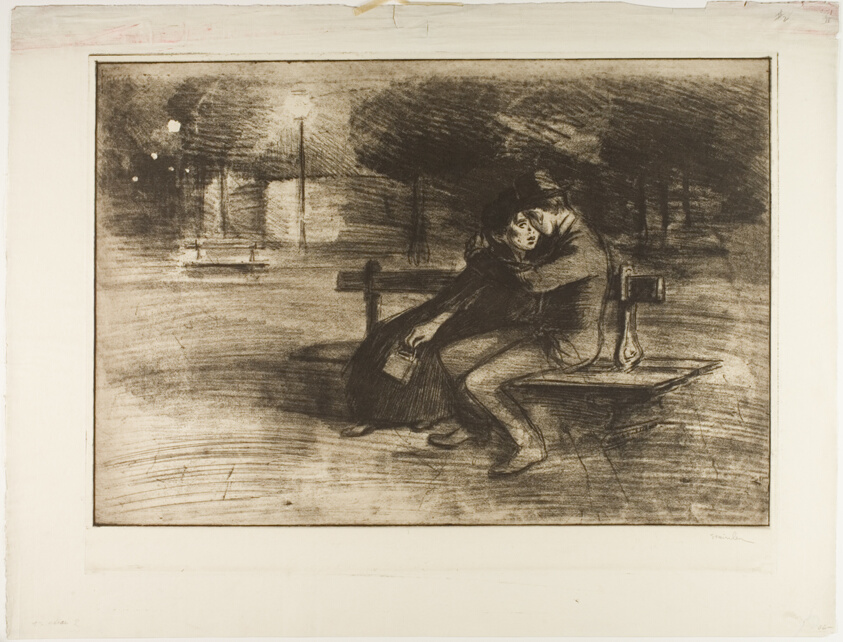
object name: Print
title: Lovers on a Bench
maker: Théophile-Alexandre Steinlen; French, born Switzerland, 1859-1923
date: April 1902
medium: Soft ground etching, aquatint and etching in warm black on ivory laid paper. Red ink (?) rubbed on paper, u.l. margin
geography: France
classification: etching; print; prints and drawing